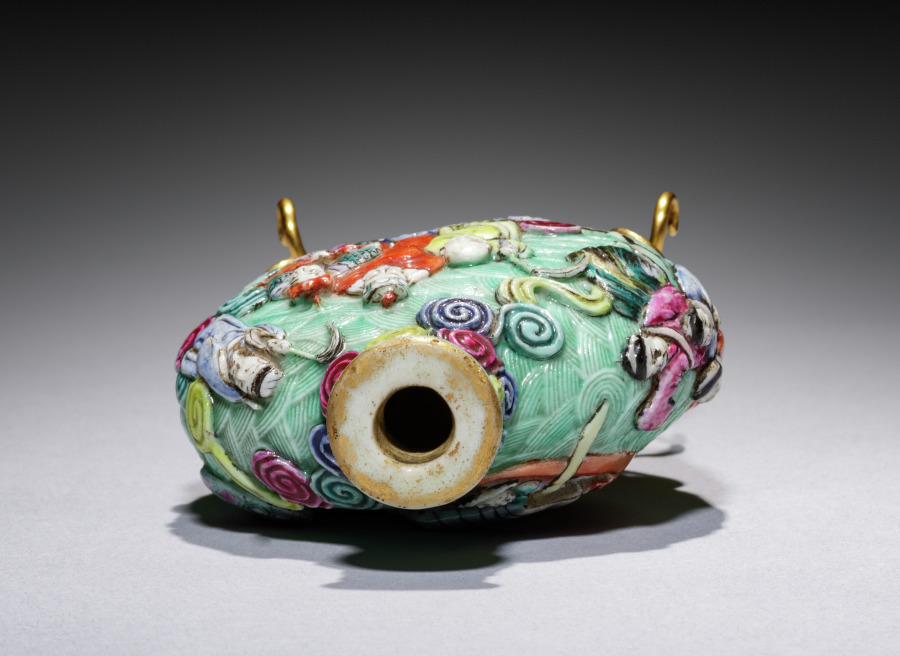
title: Flattened Ovoid Snuff Bottle with Stopper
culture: China, Qing dynasty (1644-1911), Jiaqing reign (1796-1820)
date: 1796–1820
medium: porcelain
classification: Ceramic